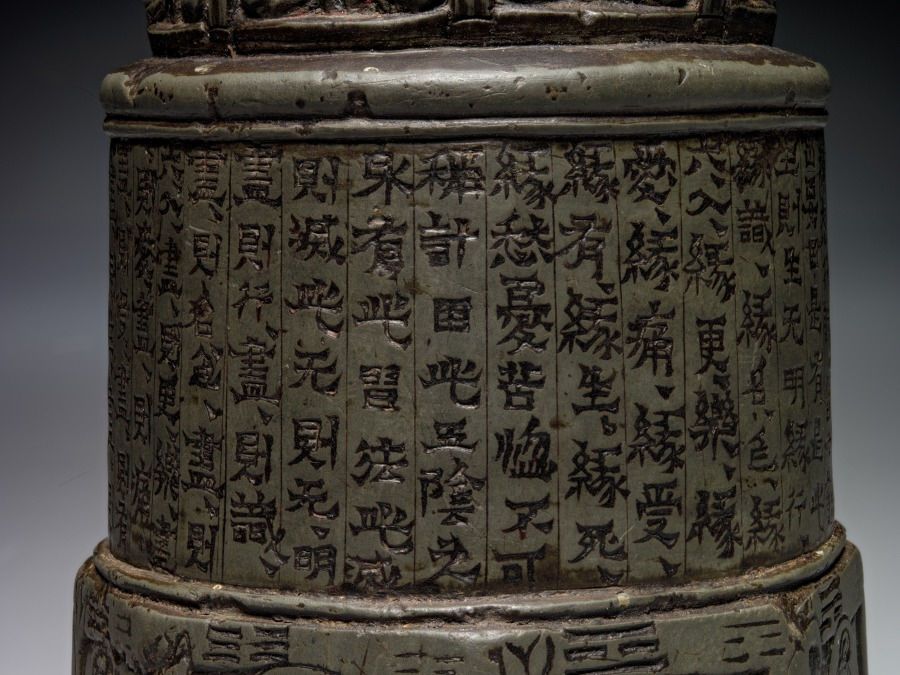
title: Miniature Votive Stupa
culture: China, Gansu province, Northern Wei dynasty (386-534)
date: 435 CE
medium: steatite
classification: Sculpture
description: This sutra pillar, inscribed with a sacred Buddhist text, belongs to a group of miniature stupas (jingta) that were found exclusively in the Gansu corridor, Northwest China. Ranging in date between AD 426–36, some of them bear the names of the lay Buddhist donors who commissioned them. A stupa is an architectural round structure built for the veneration of Buddhist relics. Miniature stupas may have commemorated the visit of a sacred site or represented donations to religious communities and sites.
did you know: There are trigrams, three horizontal lines, broken or continuous, above each of the eight bodhisattvas in the stupa's lower section.